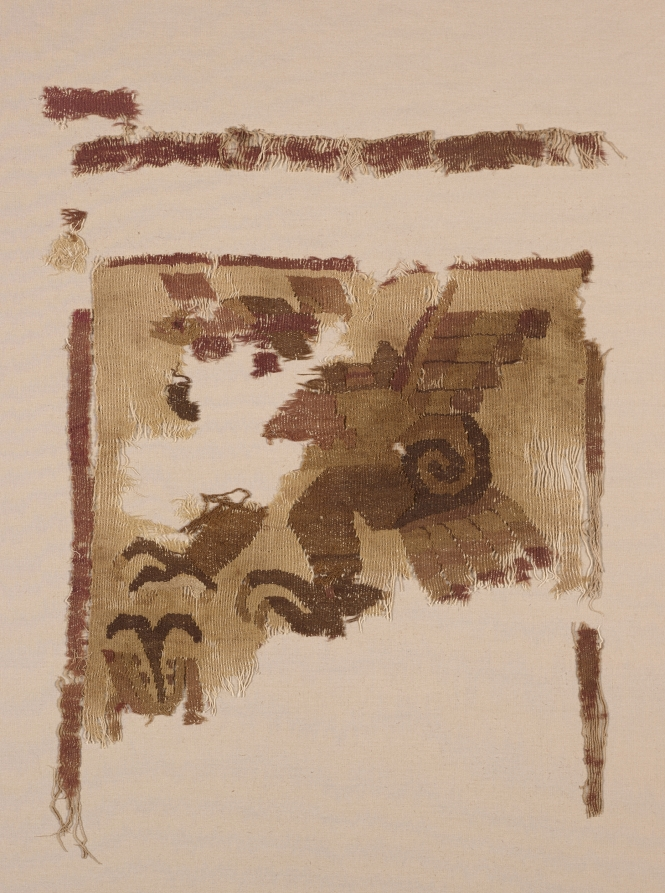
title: Textile Fragment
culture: Peru, Moche, north coast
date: c. 50–650 CE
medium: cotton and camelid fiber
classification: Textile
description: This fragment, one of several in the collection, is a rare survivor of catastrophic rains that destroyed much of the Moche textile legacy and may have helped to bring about the decline of Moche culture. It depicts a serpent and a snail beneath a hovering raptorial bird—perhaps a snail kite, a type of hawk named after its favored food. The size of the motifs implies that the original textile was large; a mantle (a shawl-like garment) or a hanging are among the possibilities.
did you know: This fragment is a rare survivor of floods that destroyed much of the Moche textile record.